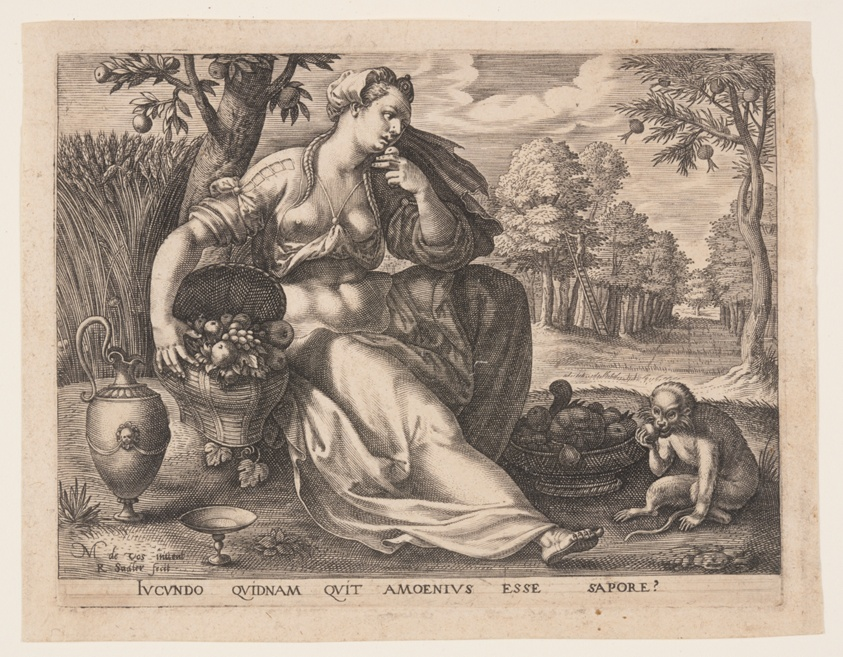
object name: Print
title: Taste, from The Five Senses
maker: Raphael Sadeler I (Flemish, 1560/61–1628/32); after Maarten de Vos (Flemish, 1532–1603)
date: 1581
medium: Engraving on paper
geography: Flanders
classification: engraving; paper; print; prints and drawing